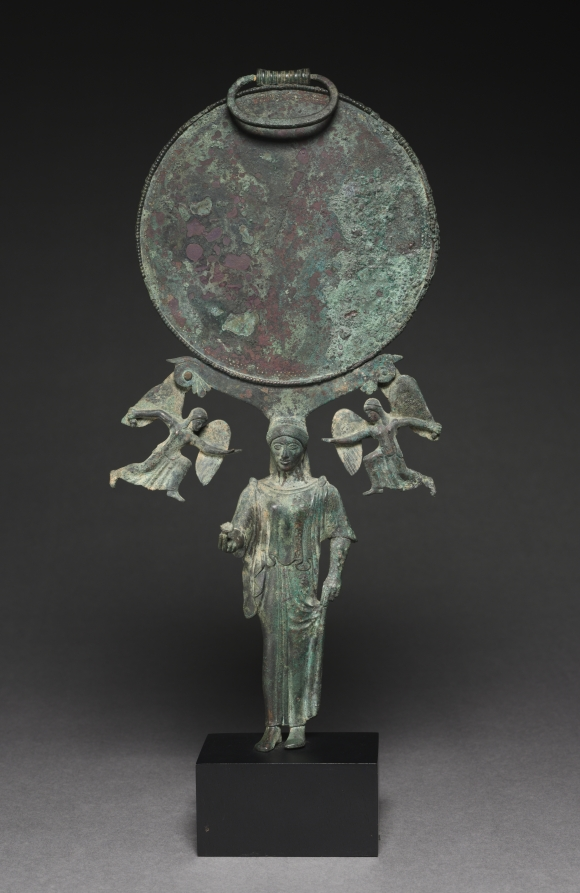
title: Mirror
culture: Greece, Sicyon(?)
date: c. 470–460 BCE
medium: bronze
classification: Metalwork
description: Named for their figured handles, Greek caryatid mirrors may derive from similar types created in ancient Egypt many centuries earlier (like CMA 1983.196). Greek caryatid handles typically take the form of a beautiful, draped woman like this one, whether mortal or divine (perhaps the love goddess Aphrodite). Often, she holds a small offering, here a flower. The small, winged women (Nikai) flanking her are unusual among such mirrors, which often feature Erotes in this position. In antiquity, the unadorned disk would have been highly polished and reflective, and the figure would have stood on an integrated base.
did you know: The term caryatid from classical architecture refers to the female figure serving as a support.